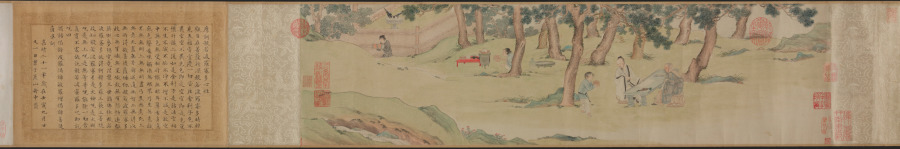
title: Zhao Mengfu Writing the Heart (Hridaya) Sutra in Exchange for Tea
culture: China, Ming dynasty (1368–1644)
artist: Qiu Ying (Chinese, 1494–1552)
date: 1542–43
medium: handscroll, ink and light color on paper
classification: Painting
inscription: Inscription accompanying text of "Heart" sutra, by Wen Zhengming 文徵明 (1470-1559): Zhengming 徵明, written in a boat at Kunshan 崑山, on the twenty-first day of the ninth month, in the renyin 壬寅 year, the twenty-first year of the Jiajing era [1542].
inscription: Colophon by Wang Shih-mou: Chou Yü-shün [Feng-lai] of K'un-shan was a scholarly, refined connoisseur of antiquities. He had acquired the poem written by Chao Ch'eng-chih [Chao Meng-fu] about the exchage of tea for Chao's calligraphy of the Prajna sutra. But the sutra itself, also written by Chao Meng-fu, is lost. He therefore asked Ch'iu Shih-fu [Ch'iu Ying] to do a painting and had Wen Cheng-ming, the artist-in-attendance, write the Hridaya Sutra in the "small, regular" style for replacement. Both works are so excellent that even Chao Meng-fu himself would certainly applaud if he should be reborn to see them. I, Shih-mou, had gotten possession of this scroll from the family of Chou Yü-shün, and since it was so wonderfully matched with one of the treasures in my collection. the Hridaya Sutra written by Chao Meng-fu for Priest Li in "running script," like the reuniting of two halves of a jade pi, I completed the scroll with the several colophons written for the "tea-exchange" poem. I did this because the painting of Ch'iu Ying and the calligraphy of Wen Cheng-ming are definitely masterpieces by themselves with absolutely no need to depend on any of the colophons written for the Chao Meng-fu poem. Furthermore, the two sons of Wen Cheng-ming, Shou-ch'eng [Wen P'eng] and Hsiu-ch'eng [Wen Chia]. have each written a colophon explaining the reason for replacing the calligraphy. As their writings are both acceptable for high standard, I didn't want to throw them away. [So by separating these into two scrolls] I was able to get two complete works of art in one clever stroke. I was quite pleased with myself, and hope that those who see this scroll shall not get suspicious because of the missing colophons. Wang Shih-mou wrote in his Jih-sun-chai study, on the first day of the tenth month, in the chia-shen year of the Wan-li era [1584].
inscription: Colophon by Wen P'eng: I-shao [Wang Hsi-chi] wrote in exchange for a flock of geese. Su Tung-po wrote in exchange for meat. Both episodes have become legends of a thousand years. Sung-hsüeh [Chao Meng-fu] "teased" Priest Kung for tea, and the story was immediately immortalized in the poems by all the famous scholars of the times. Indeed, how could one say his humor and elegance are not equal to the ancient worthies? Unfortunately, the poetry has survived but the writing of the sutra is lost. Yü-shün [Chou Feng-lai] therefore asked my father to make up the writing and so here is the complete work of art. Respectfully inscribed by Wen P'eng in the mid-summer of 1543.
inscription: Colophon by Wen Chia: Sung-hsüeh [Chao Meng-fu], in exchanging tea leaves for his writing of the Prajna, had put himself in the company of Yu-chün [Wang Hsi-chih] who exchanged geese for his writing of the Huang-t'ing sutra [the Yellow Chamber, or the Wai-ching ching, a Taoist text attributed to the Yellow Emperor]. However, was this romantic and cultivated gesture really intended for such small things? Actually, he was only proud that the excellence of his calligraphy had made him worthy to be the successor of the Ch'in Dynasty master. Since, very unfortunately, Chao Meng-fu's writing [of the Prajna] was already lost, my father therefore agreed to replace it, and did the calligraphy in the style of the Yellow Chamber. In addition, Yu-shün [Chou Feng-lai] had asked Mr. Ch'iu Shih-fu [Ch'iu Ying] to do a painting of the sutra writing story in the style of Li Lung-mien at the head of the scroll. Now it would seem the entire episode should go down in history for immortality. Respectfully recorded by Wen Chia, on the eighth day of the eighth month, in the year of k'uei-mao [1543]. trans. WKH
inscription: 4 colophons and 23 seals: 1 colophon, dated 1543, and 2 seals of Wen Peng (1498-1573); 1 colophon, dated 1543, and 2 seals of Wen Chia (1501-1583); 1 colophon, dated 1584, and 3 seals of Wang Shih-mou (1536-1588); 2 seals of Chou Feng-lai (16th c.); 3 seals of Sung Lo (1634-1713); 5 seals of the Ch'ien-lung emperor (r. 1736-95); 1 colophon, dated 1902, and 1 seal of Fei Nien-tz'u (1885-1905); 4 seals of Wan-go H. C. Weng (b. 1918); 1 seal unidentified.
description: The Yuan dynasty calligrapher Zhao Mengfu (1254–1322) is said to have transcribed the Heart Sutra for a certain priest named Li in exchange for tea. Later, during the Ming dynasty, the professional painter Qiu Ying from Suzhou painted this scene for his patron. Here, Zhao Mengfu holds a brush and has a piece of paper laid out before him. On the table is an ink stone, an ink stick, and a small water dropper. Drops of water would dissolve the ink stick into liquid ink when it was ground on the flat square stone.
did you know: Qiu Ying was born to a peasant family, but his natural talent led him to a successful career as a professional painter with wealthy patrons.